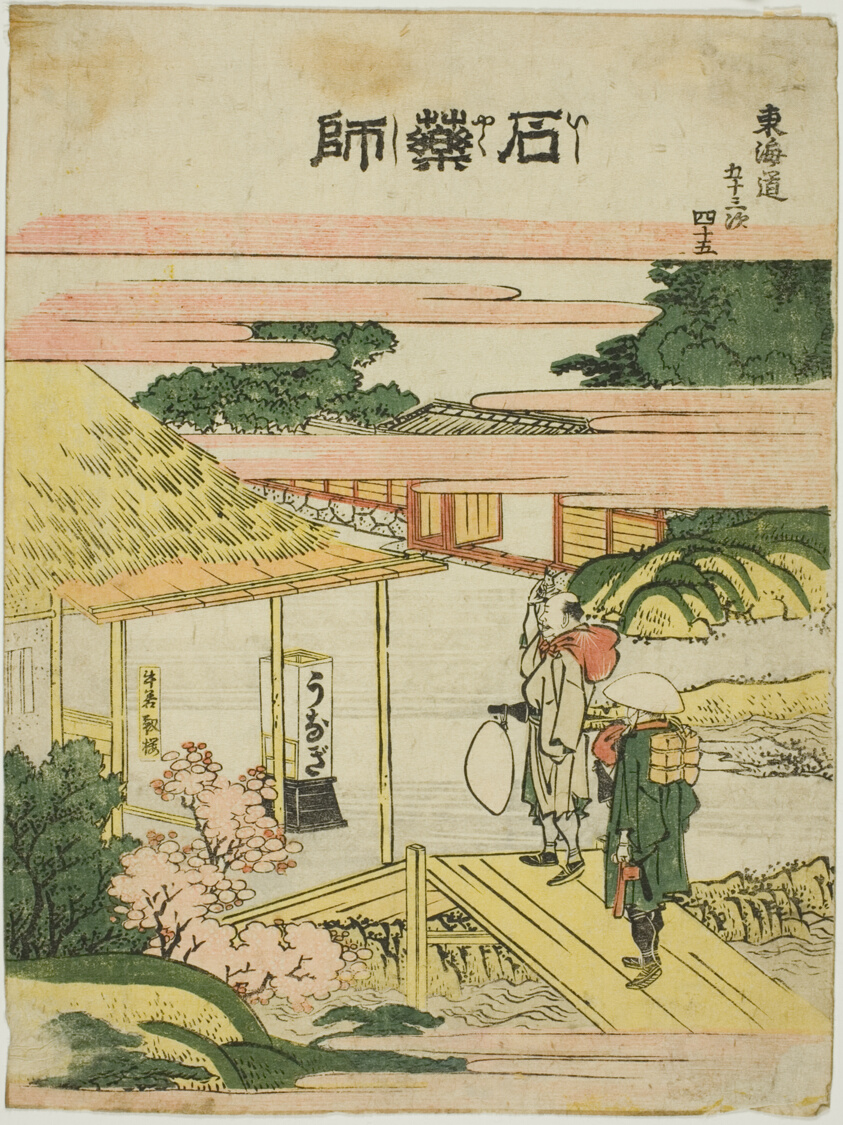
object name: Print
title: Ishiyakushi, from the series "Fifty-three Stations of the Tokaido (Tokaido gojusan tsugi)"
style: Japanese (culture or style)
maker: Katsushika Hokusai 葛飾 北斎; Japanese, 1760-1849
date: c. 1806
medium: Color woodblock print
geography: Japan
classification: woodblock print; print